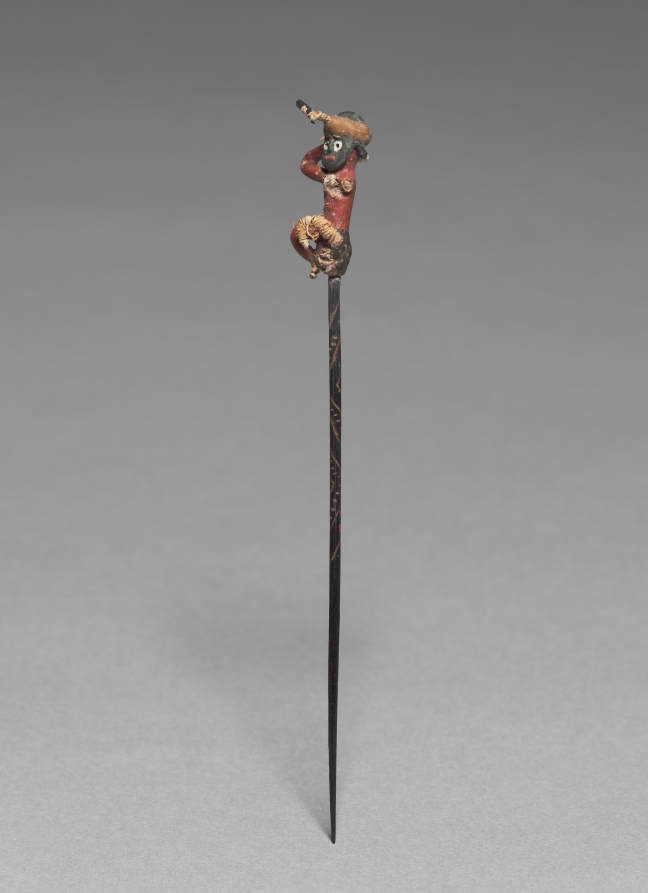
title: Pin with Yarn Figure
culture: Peru, South Coast, Nasca style?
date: c. 300 BCE–200 CE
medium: wood, yarn, paint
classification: Jewelry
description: Paracas headgear from mummy bundles sometimes incorporate human-hair wigs, wound with long headbands and slings. Ornamented with a diminutive kneeling figure, this pin may have been used like a hat pin to hold the wrappings in place. Although poorly preserved, this object illustrates the use of resin pigment on materials other than ceramics.